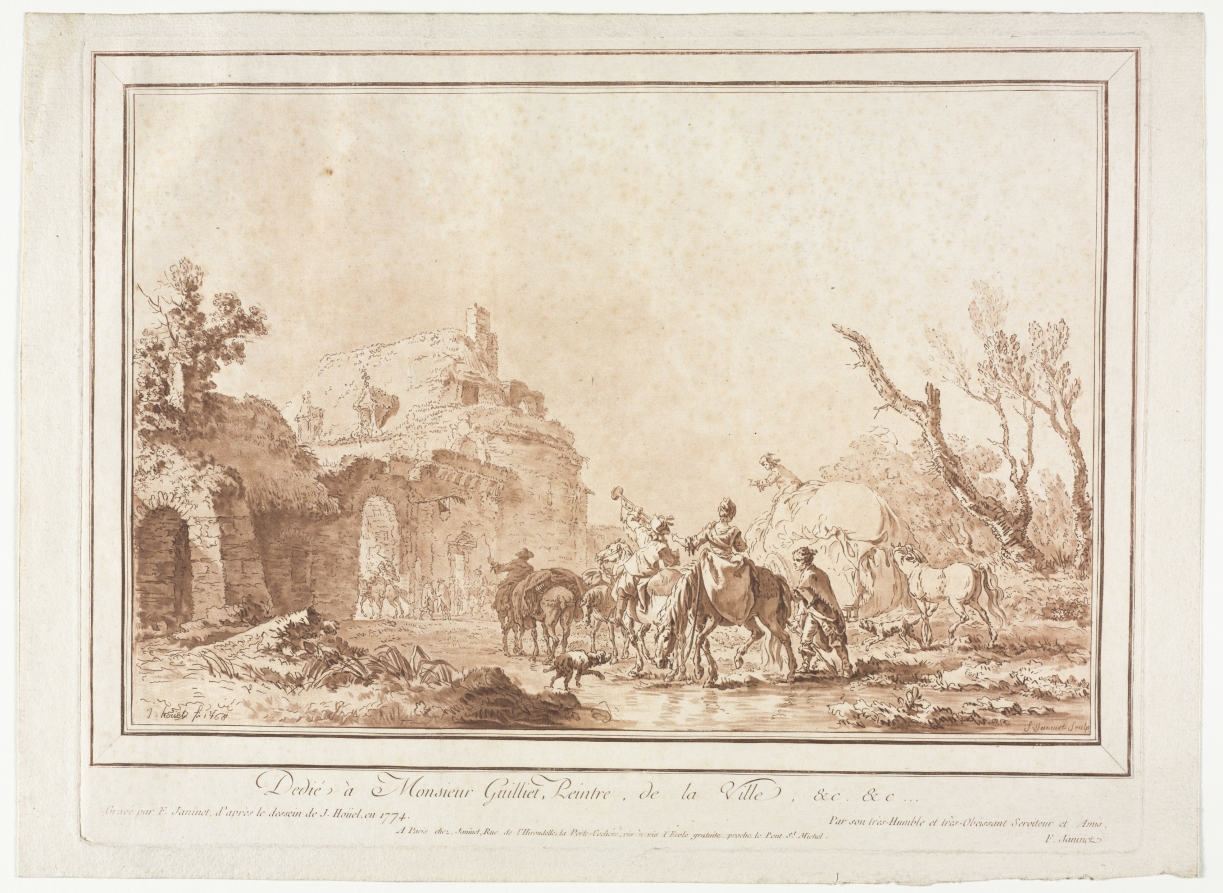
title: Before the Rampart of a Village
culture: France, 18th century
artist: Jean François Janinet (French, 1752–1814)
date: 1774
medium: aquatint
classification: Print